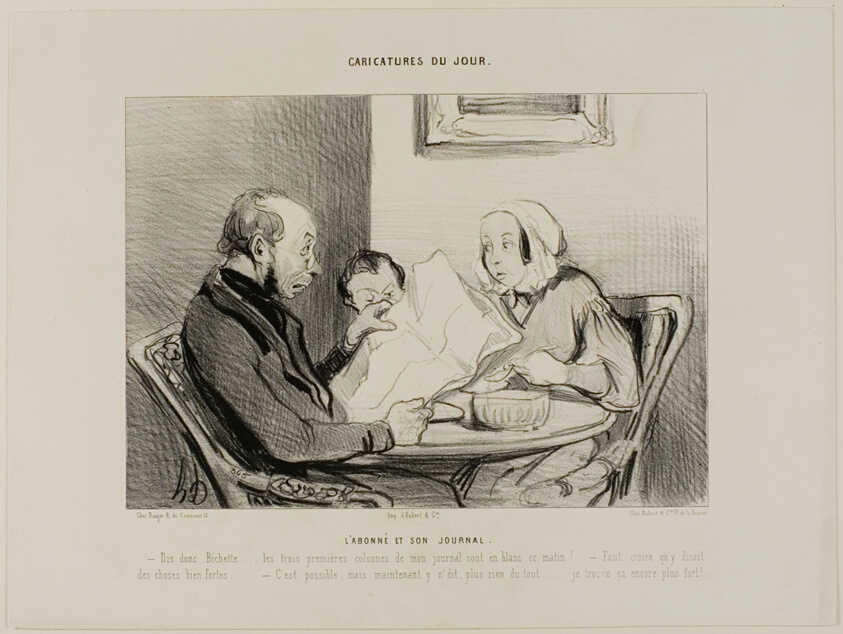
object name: Print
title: The Subscriber and His Newspaper. “- Listen darling, the first three columns of my morning paper are completely empty! It seems that they must have really said some nasty things. - May quite well be, but now that you mention it, to write nothing at all, I find that even more nasty!,” plate 2 from Caricatures Du Jour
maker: Honoré Victorin Daumier; French, 1808-1879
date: 1842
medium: Lithograph in black on ivory wove paper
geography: France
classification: lithograph; print; prints and drawing